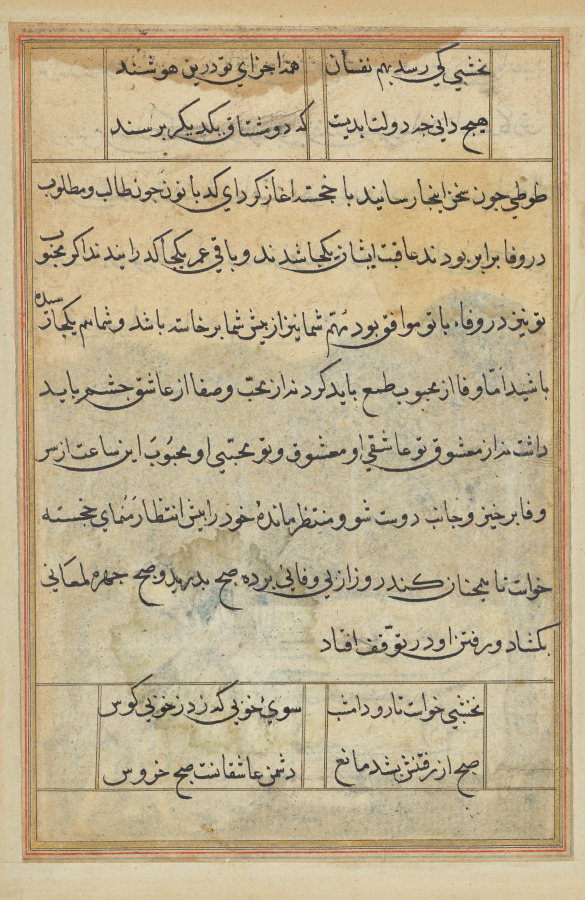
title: Page from Tales of a Parrot (Tuti-nama): text page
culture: Mughal India, court of Akbar (reigned 1556–1605)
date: c. 1560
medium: gum tempera, ink, and gold on paper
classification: Painting